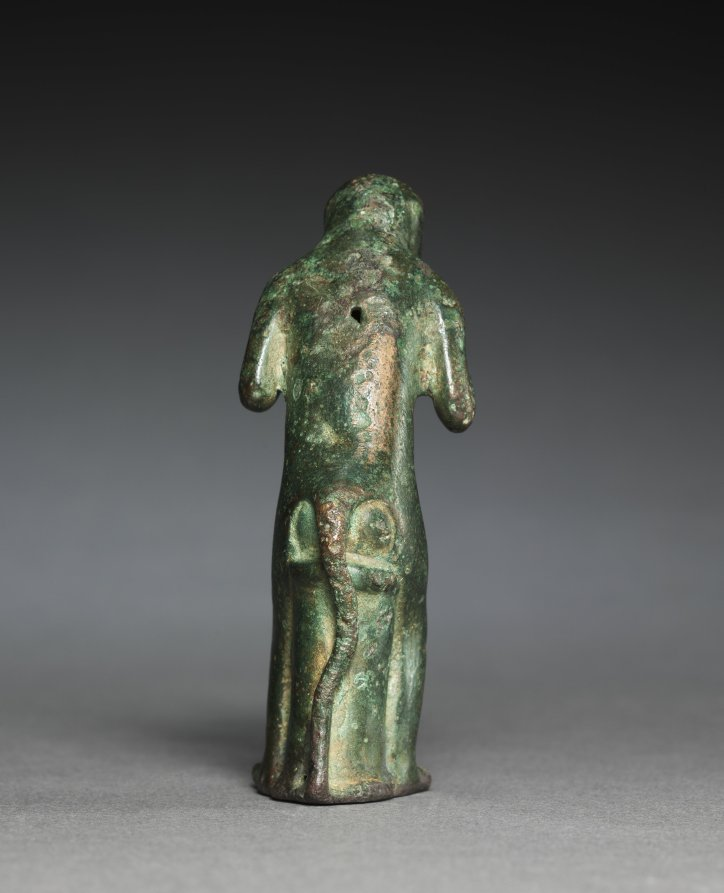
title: Baboon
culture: Egypt, Late period (715–332 BCE), Dynasty 26, Saite period (664–525 BCE)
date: 664–525 BCE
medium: bronze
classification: Sculpture